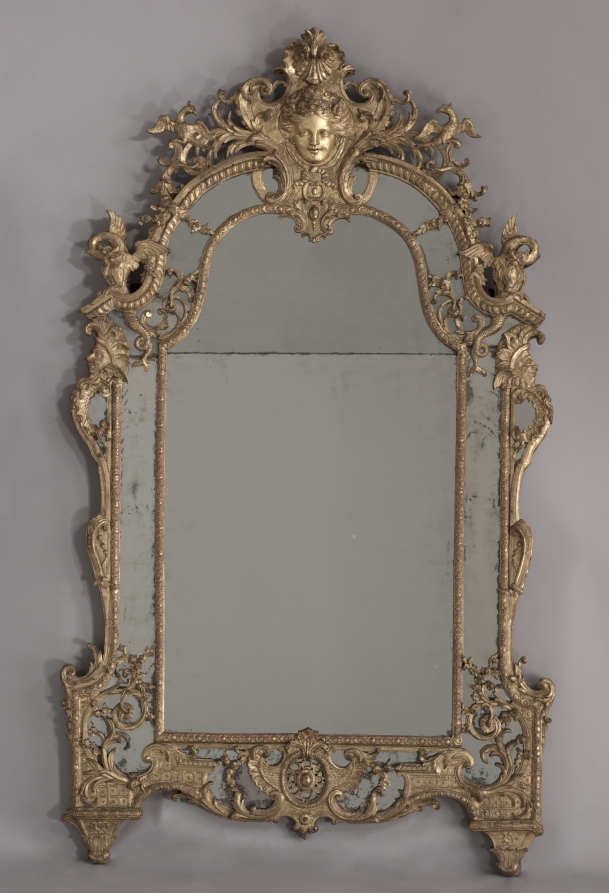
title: Wall Mirror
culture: France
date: c. 1720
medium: carved and gilded wood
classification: Furniture and woodwork